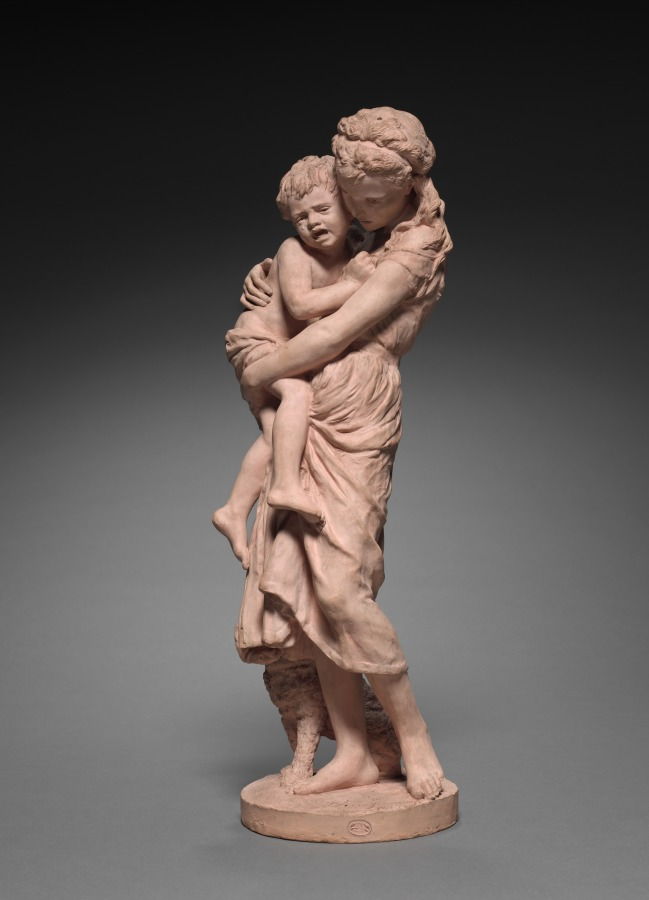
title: Brother and Sister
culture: France, 19th century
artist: Jean-Baptiste Carpeaux (French, 1827–1875)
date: 1875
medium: terracotta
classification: Sculpture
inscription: Signed "JBT" Carpeaux/1875" upper surface of base.